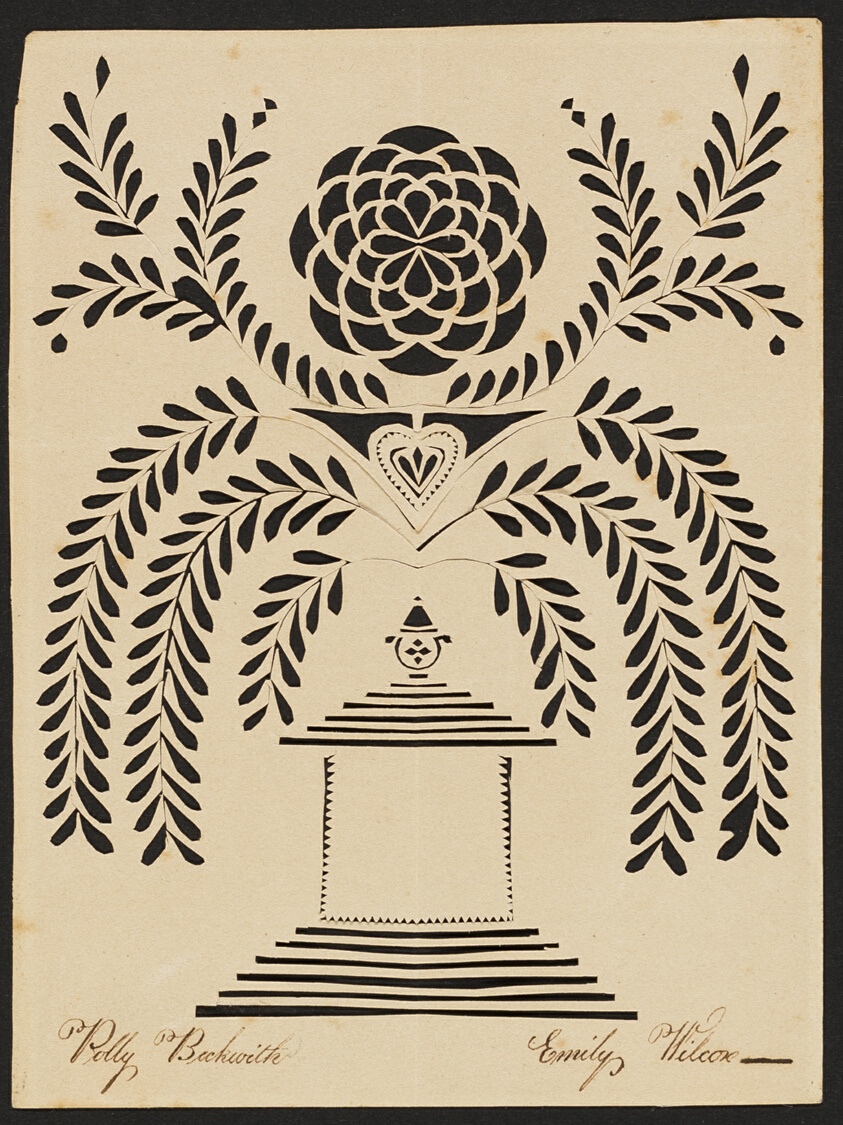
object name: Drawing and Watercolor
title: A Condolence Card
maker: Emily Wilcox (American, 19th century)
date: c. 1830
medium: Paper cutout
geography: United States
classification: stencil; prints and drawing; paper; drawings (visual works)